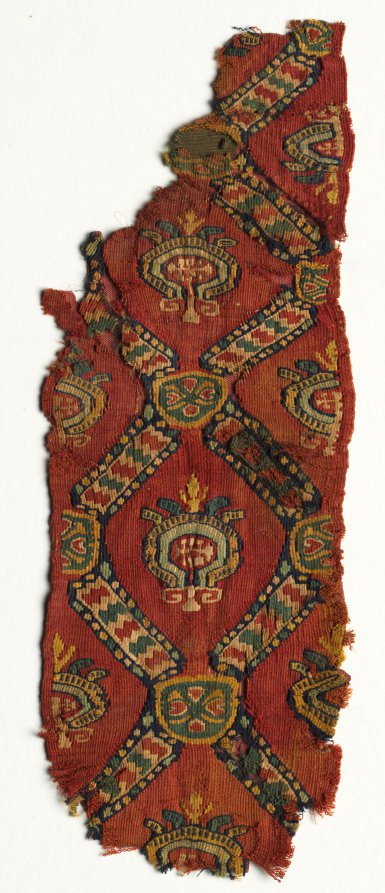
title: Fragmentary Ornament from a Tunic with Lozenges and Medallions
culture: Egypt, Abbasid period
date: mid 700s - mid 800s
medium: tapestry weave; wool and linen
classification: Textile